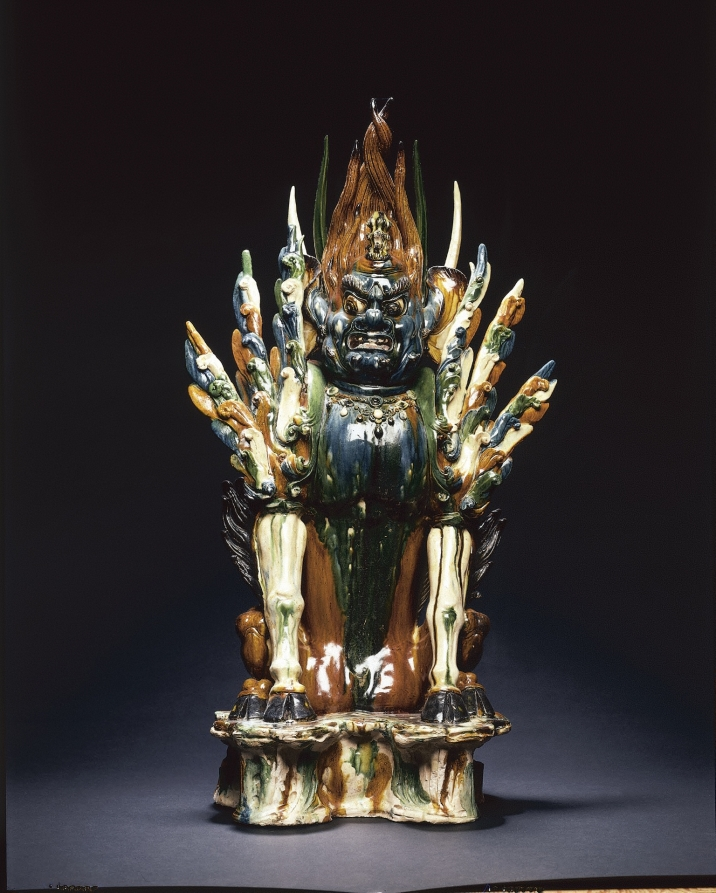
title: Tomb Guardian with Human Face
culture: China, probably Shaanxi province, Xi'an, Tang dynasty (618-907)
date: early 700s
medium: glazed earthenware, sancai (three-color) ware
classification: Ceramic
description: With their fierce expressions and exaggerated physical features, these two fantastic guardian creatures were intended to guard the entrance to a tomb, warding off evil as well as keeping the soul of the deceased from wandering. Known as "earth spirits" or qitou, this one sports a human face with huge protruding ears and a short horn surrounded by fiery, twisting hair; the other has an animal face and a pair of antlers growing above its eyebrows. Their many elongated spikes heighten the fearful intensity. Before tomb sculptures were placed in the tomb, they were carried through the streets in a funerary procession. Funerary gifts provided the deceased with means for the afterlife. They were also an expression of filial piety and demonstrated the wealth and power of the descendants.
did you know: Cobalt blue glaze used on the head and chest was imported from the Middle East.